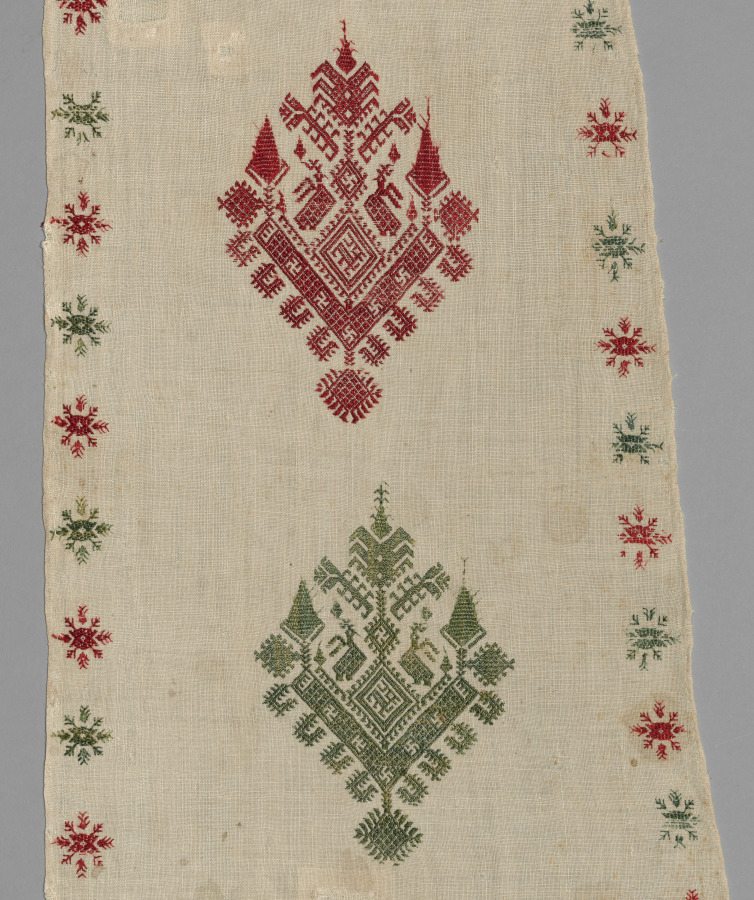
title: Portion of a Bed Tent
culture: Greece, Cyclades Islands, Pholegandros, 17th-18th century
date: 1600s - 1700s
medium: embroidery: silk on linen tabby ground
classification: Embroidery